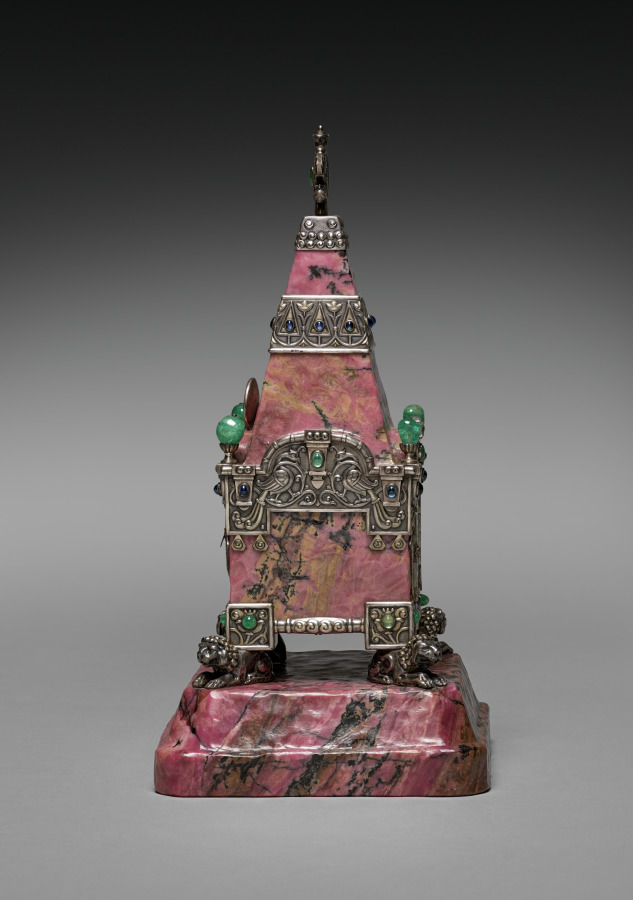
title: Kremlin Tower Clock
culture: Russia, St. Petersburg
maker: House of Fabergé (Russian, 1842–1918)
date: c. 1913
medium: rhodonite, silver, enamel, emeralds, sapphires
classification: Timepiece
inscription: 84, Kokoshnik, delta [assay mark for Moscow, 1908-26]; 91, Kokoshnik; 91; Kokoshnik; C. Fabergé (in Cyrillic); double-headed eagle [imperial warrant]; 16419 k? scratched.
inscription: Painted on clock face: Le Gruet (in script); strike, silence, set hand work (in English).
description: The use of Russian hardstones in creating precious objects became a hallmark of design from the House of Fabergé. Easily carved, these minerals were sourced largely from the western region surrounding the Ural Mountains. Fabergé's workmasters used colorful stones such as agate, nephrite (jade), lapis lazuli, rock crystal, and rhodonite, seen here in this elaborate table or mantel clock, to create all manner of luxurious accessories. Bright pink rhodonite was among the rarest, and consequently most expensive, specimens used by the House of Fabergé. This clock resembles the Taynitskaya Tower, the middle tower on the south side of the Kremlin. The House of Fabergé created this work to commemorate the 300th anniversary of the Romanov dynasty, representing Fabergé's ability to balance the functionality of objects with intricate decorative design.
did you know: The Kremlin tower, which this clock resembles, has a secret well and an underground tunnel that leads to the Moscow River.